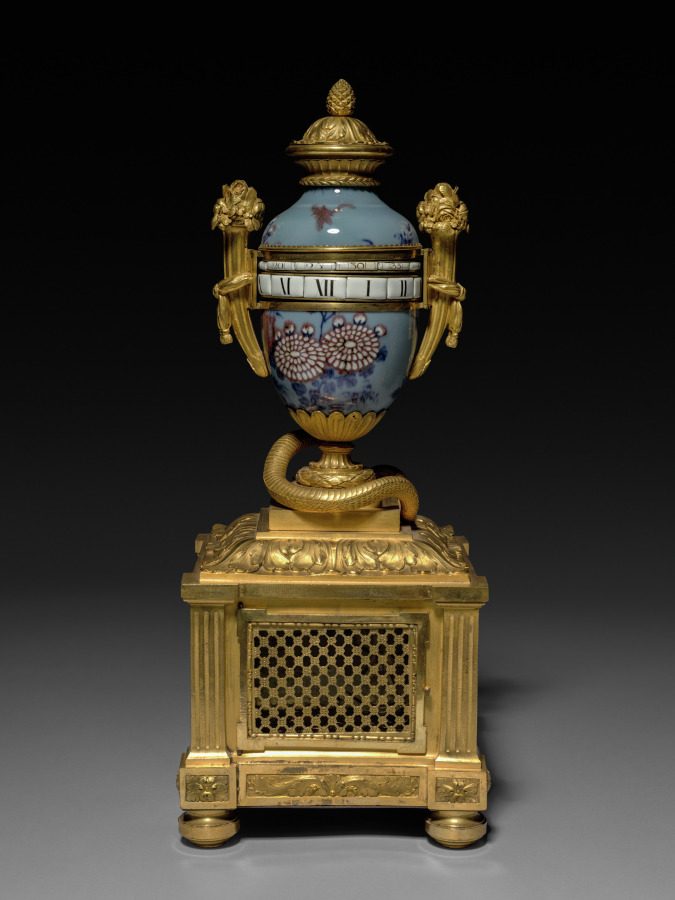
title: Clock for a Garniture Set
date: 1736–1770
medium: Chinese hard-paste porcelain, gilt bronze, enameled metal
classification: Furniture and woodwork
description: The fascination with Chinese porcelain among aristocratic circles increased during the reign of Louis XV. In reaction to the perceived excesses of elaborate naturalistic ornament of the 1750s, mount makers increasingly turned to neoclassical designs, known as Goût Grec (Greek taste) in the 1760s and 1770s. These beautifully chased gilt-bronze mounts feature classical Greco-Roman motifs such as lion masks, acanthus and laurel leaves, and pilasters.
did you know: A set of vases and clock, connected visually by the use of the same materials, often adorned a mantlepiece or the top of a large piece of furniture, such as a commode or console, within a room.